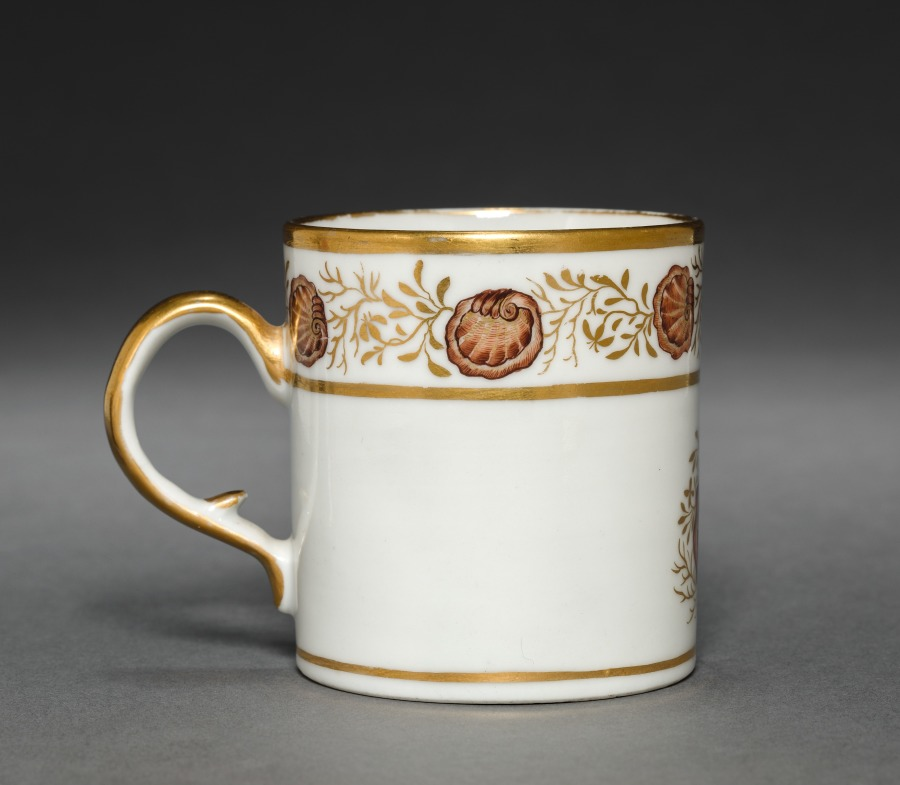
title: Cup from Oliver Wolcott, Jr. Tea Service (3 of 6)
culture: Chinese Export porcelain, late 18th-early 19th century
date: 1785–1805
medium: porcelain, sepia enamel, gold leaf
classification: Ceramic